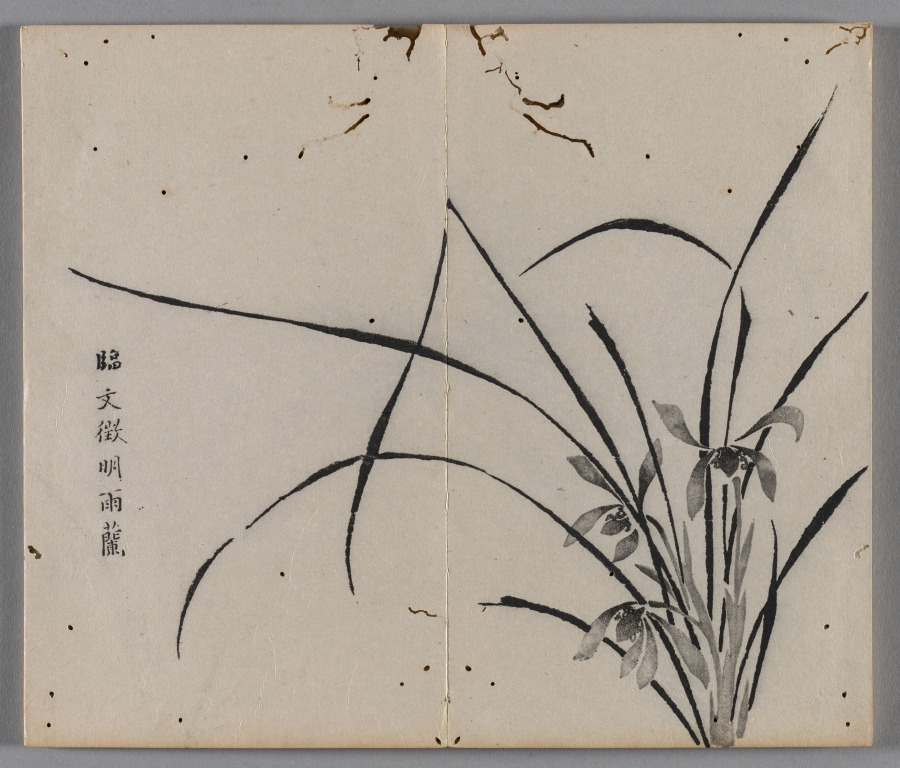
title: Ten Bamboo Studio Painting and Calligraphy Handbook (Shizhuzhai shuhua pu): Orchids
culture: China, Qing dynasty (1644-1911)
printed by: Hu Zhengyan (Chinese, c. 1584–1674)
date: 1633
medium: Woodblock-printed book; ink and colors on paper; first edition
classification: Print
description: Color printing reached a level of perfection in the early 1600s, as seen in this Ten Bamboo Studio Collection of Calligraphy and Painting and the Mustard Seed Garden Manual of Painting (printed 1679 and 1701). The painterly quality, precision in registering (aligning) the woodblocks, and harmonious colors made them the most successful color print editions in Chinese history. Both editions were printed and compiled in Nanjing, spread nationwide, and had a great impact on the arts in Japan and Korea.